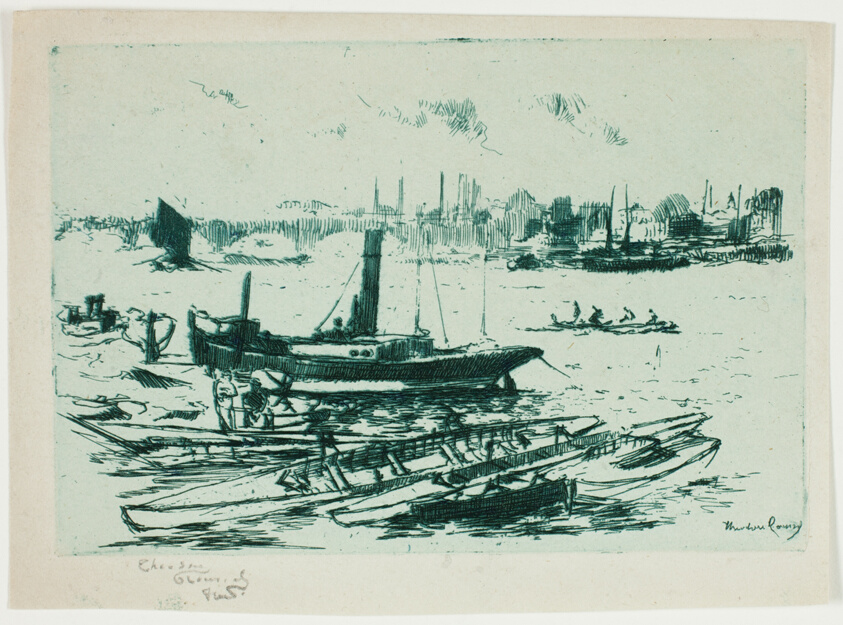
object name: Print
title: The Steam Launch, Chelsea Embankment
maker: Theodore Roussel (French, worked in England, 1847-1926)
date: 1888–89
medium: Etching in blue-green, with plate tone, on cream wove paper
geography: England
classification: etching; paper; print; prints and drawing